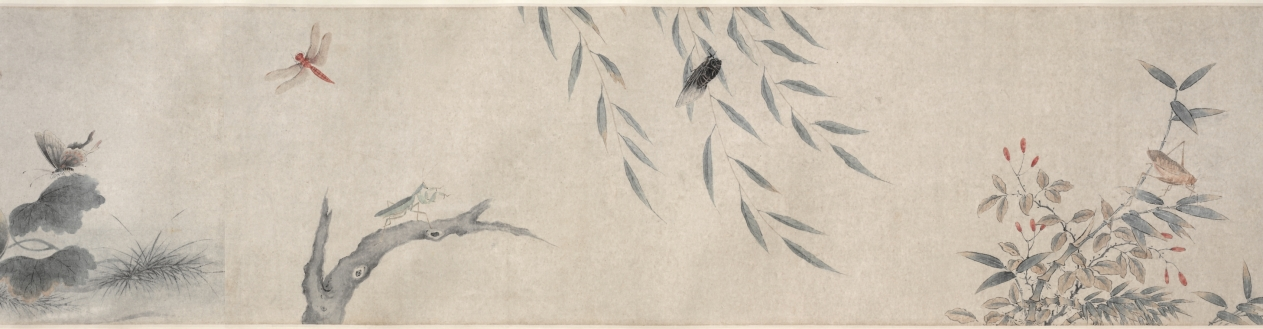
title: Insects and Flowers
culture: China, Qing dynasty (1644-1911) or Republican period (1912-49)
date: c. 1900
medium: Handscroll, ink and color on paper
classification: Painting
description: More than 26 feet long, this scroll presents insects, reptiles, and plants in delicate brushwork and pale colors, referring in style to earlier Southern Song dynasty (1127–1279) bird-and-flower paintings. Upon closer inspection, ants dismember a butterfly and reptiles wait to ambush their prey. An inscription at the end of the painting gives us an idea of its meaning: Attributed to the Qing dynasty scholar Zhang Xigeng (張錫庚, 1801–1861), the inscriber relates the work to an earlier painting by Qian Xuan (錢選, c. 1235–before 1307) and further suggests that the painting may allude to the relentlessness of natural selection. By drawing a parallel to tumultuous episodes in Chinese history, the writer might even hint at the domestic rebellions and the aggression of Western powers against China in his lifetime, particularly the Opium Wars (1839–60).